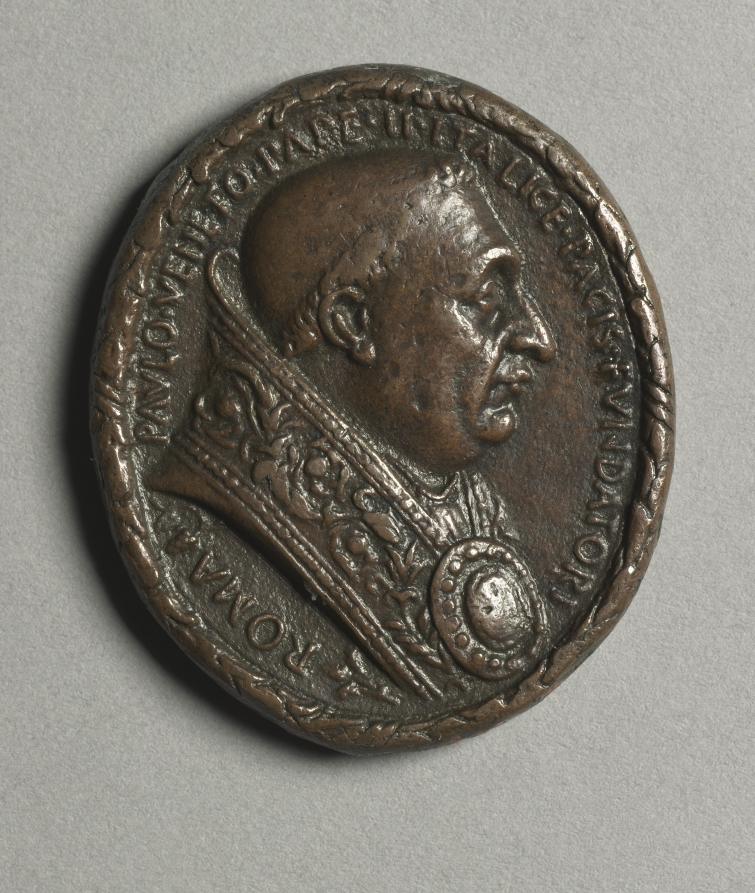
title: Portrait of Pope Paul II Barbo (obverse)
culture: Italy, 15th century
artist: Cristoforo di Geremia (Italian, active 1456–76)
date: c. 1468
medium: bronze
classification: Sculpture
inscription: obervse: PAVLO VENETO PAPE II ITALICE PACIS FVNDATORE ROMA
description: Rediscovered with fervor in the Renaissance, profiles on ancient coins provided dignified models for Renaissance elites.